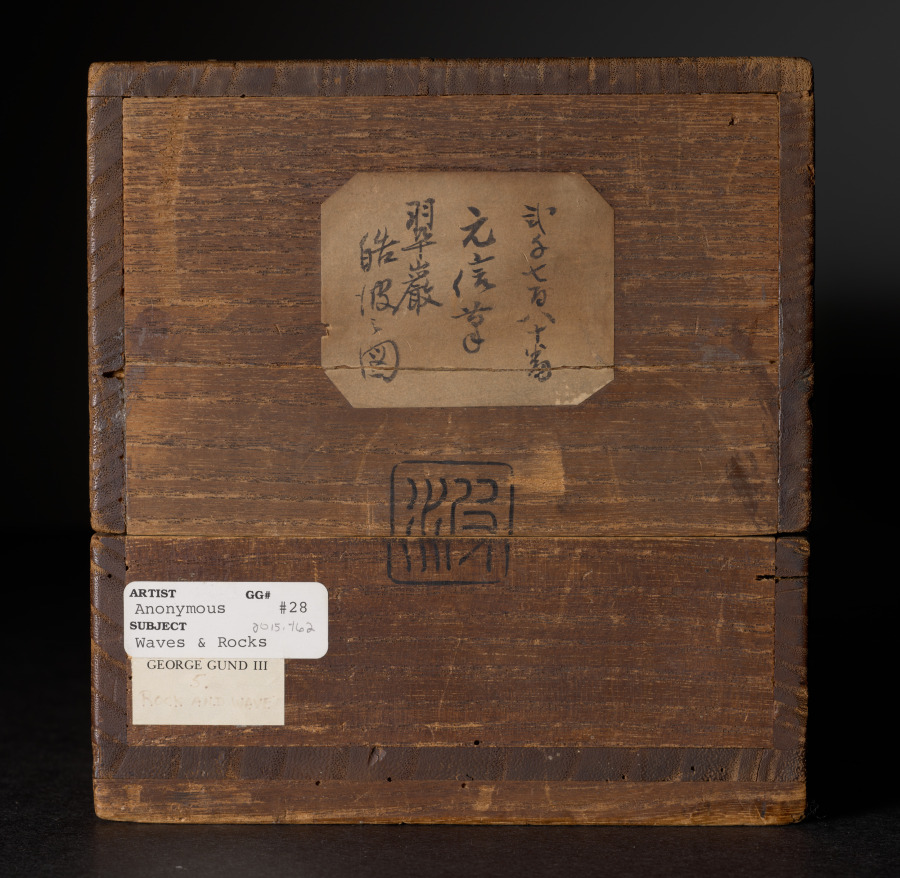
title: Rocks and Waves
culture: Japan, Muromachi period (1392–1573)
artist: attributed to Kano Motonobu (Japanese, c. 1476–1559)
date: early to mid-1500s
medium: sliding door fragment mounted as a hanging scroll; ink and gold wash on paper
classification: Painting